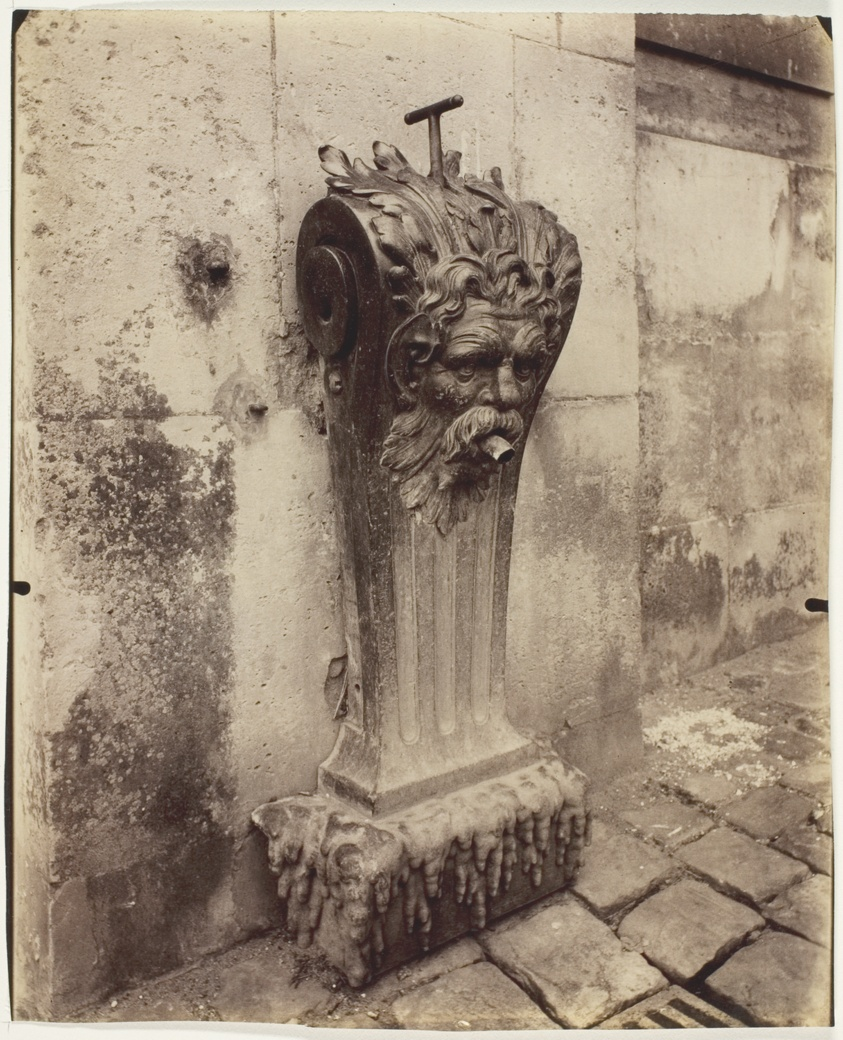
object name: Photograph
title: Versailles, Fontaine dans la Cour de Marbre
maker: Jean-Eugène-Auguste Atget (French, 1857–1927)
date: 1903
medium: Albumen print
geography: France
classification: albumen silver print; photographic process; photography; photograph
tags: Collected by Hugh Edwards